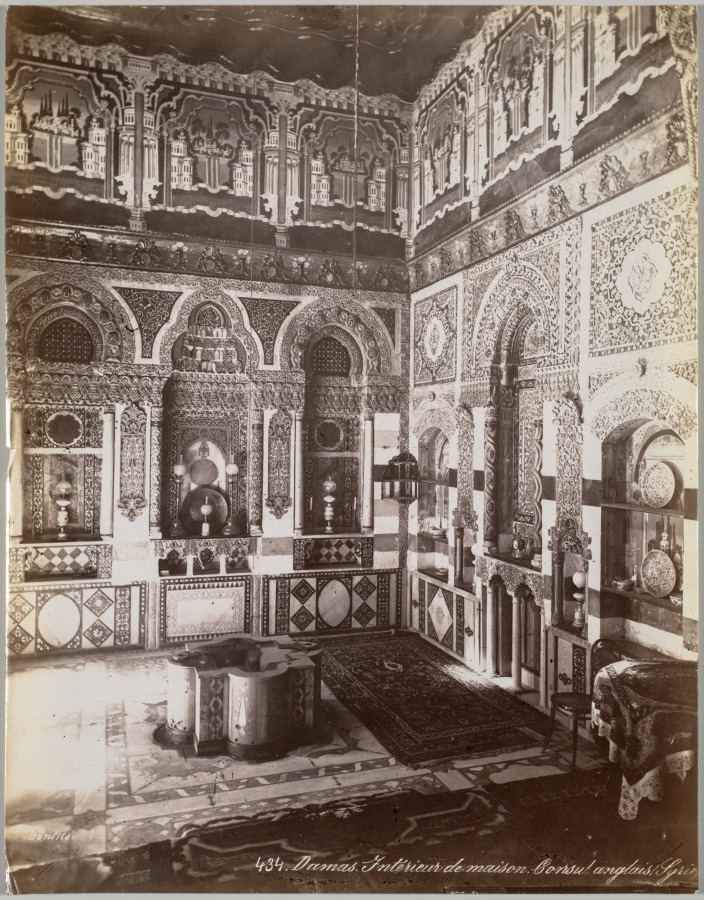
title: Damas. Intérieur de Maison. Consul Anglais (Syrie)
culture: France, 19th century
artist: Félix Bonfils (French, 1831–1885)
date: between 1867 and 1899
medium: albumen print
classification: Photograph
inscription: Imprinted in white on recto: “434. Damas Interieur de maison. Consul anglais/Syrie” Imprinted in white on recto: “Bonfils”